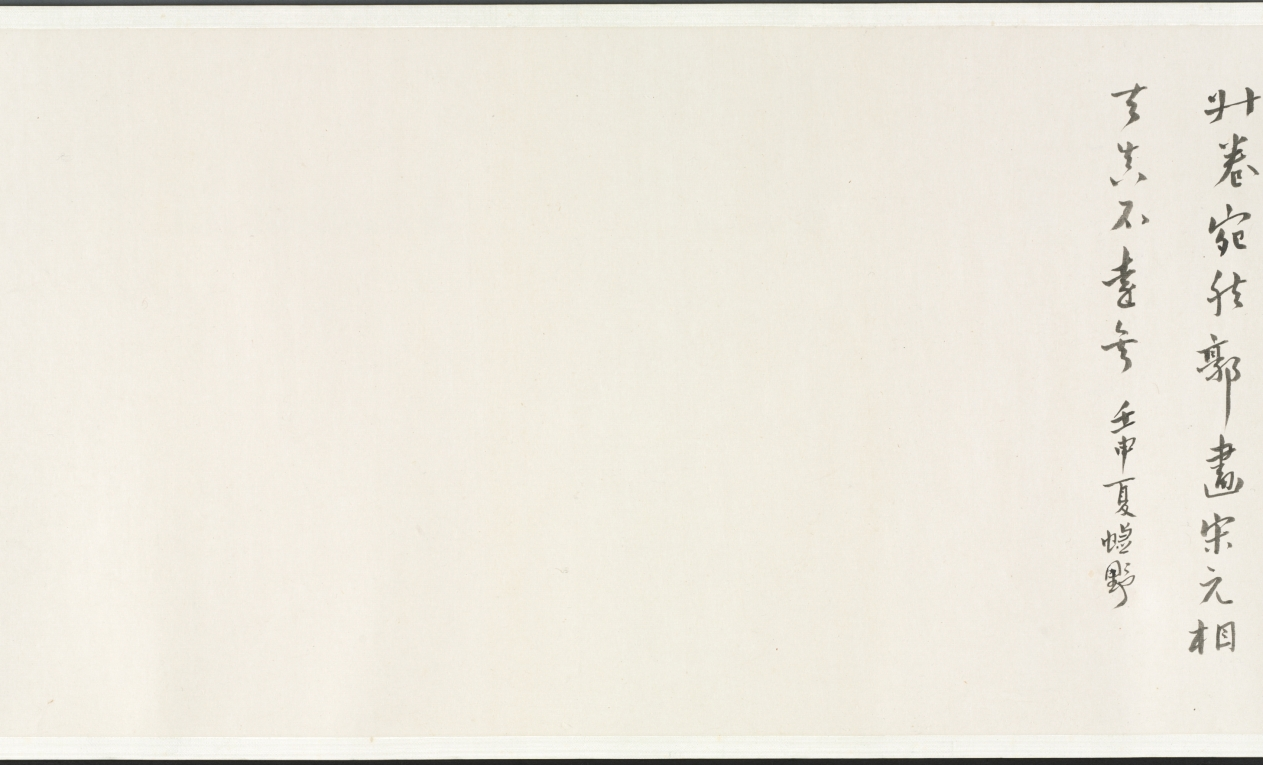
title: Buddha's Conversion of Five Bhiksu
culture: China, Yuan dynasty (1271–1368)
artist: Li Sheng (Chinese, active c. 1324–after 1375)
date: mid-1300s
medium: handscroll; ink on paper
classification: Painting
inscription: 紫篔生李升識 [印] 李氏子雲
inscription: 4 colophons and 12 additional seals: The "Heart" Sutra (Maha Prajnaparamita) text written by Wu Yuqing 吳餘慶 (active early 1400s); 2 seals of Xu Qianxue 徐乾學 (1631–1694); 3 colophons, one dated 1929 and two dated 1936, and 9 seals of Wu Hufan 吳湖帆 (1894–1968); 1 colophon, dated 1932, of Chen Dingshan; 1 seal unidentified.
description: This episode stems from the life of the historical Buddha, who, after his enlightenment, was initially hesitant about preaching his own doctrine. After much personal deliberation and prodding by deities, he finally relented. The first converts were the five guards who served him when he was still a prince. For Li Sheng, this is the pretext of the painting, which moves from the interaction of the bhiksu with the Buddha to a broader awareness of the vast surroundings of the scene.